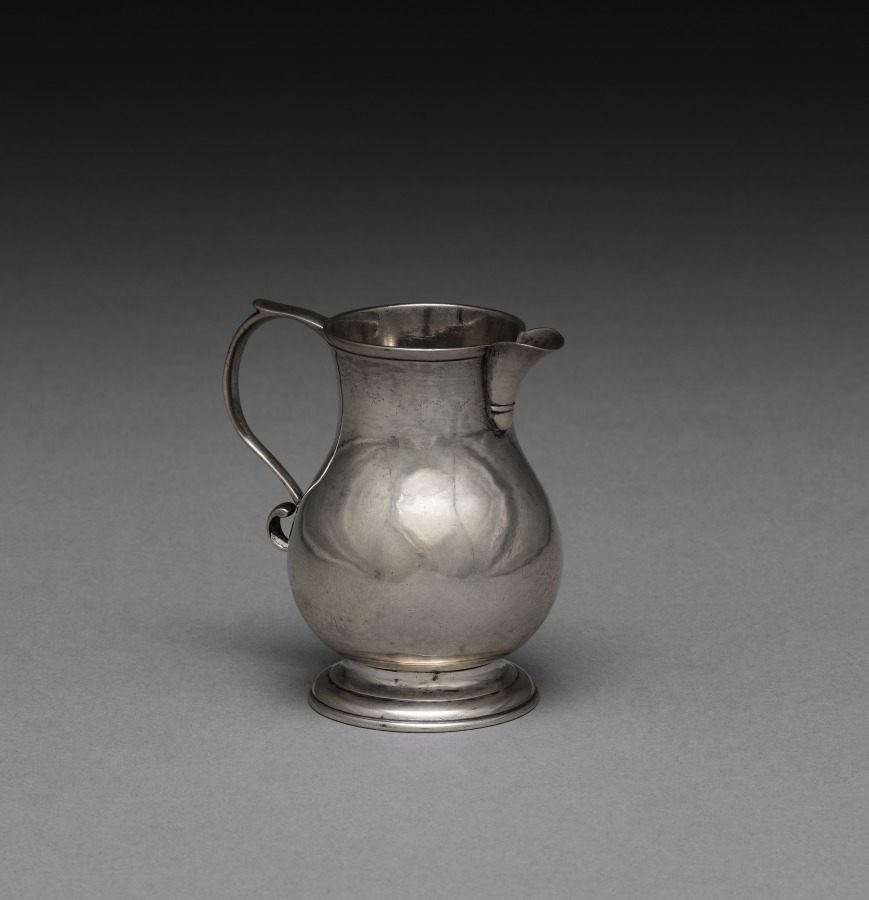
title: Cream Jug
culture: America, Massachusetts, Boston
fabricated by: John Coburn (American, 1725–1803)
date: c. 1745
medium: silver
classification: Silver